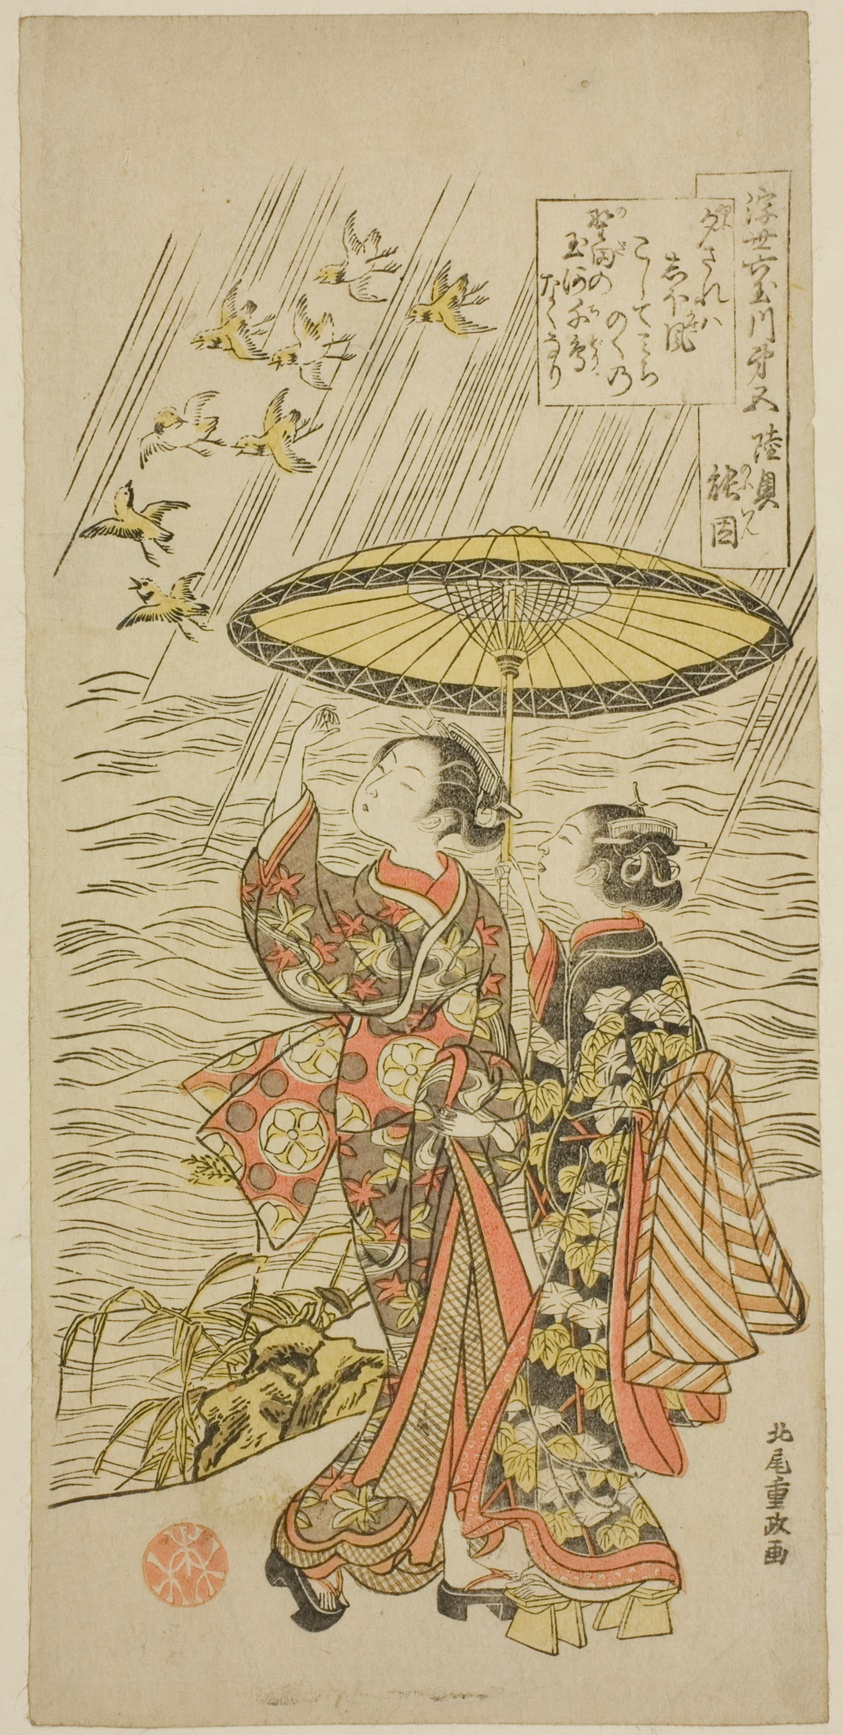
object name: Print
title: No. 5: Noda River in Mutsu Province, from the series "Six Jewel Rivers of the Floating World (Ukiyo Mu Tamagawa)"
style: Japanese (culture or style)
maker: Kitao Shigemasa (Japanese, 1739-1820)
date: c. 1769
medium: Color woodblock print; hosoban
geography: Japan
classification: woodblock print; print; asian art